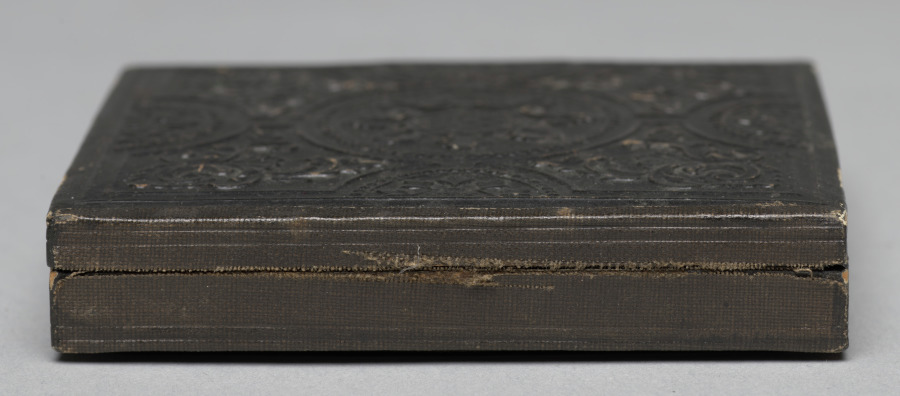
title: Shakespearean Actor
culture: America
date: c. 1858–1862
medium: ambrotype, tinted, sixth plate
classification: Photograph